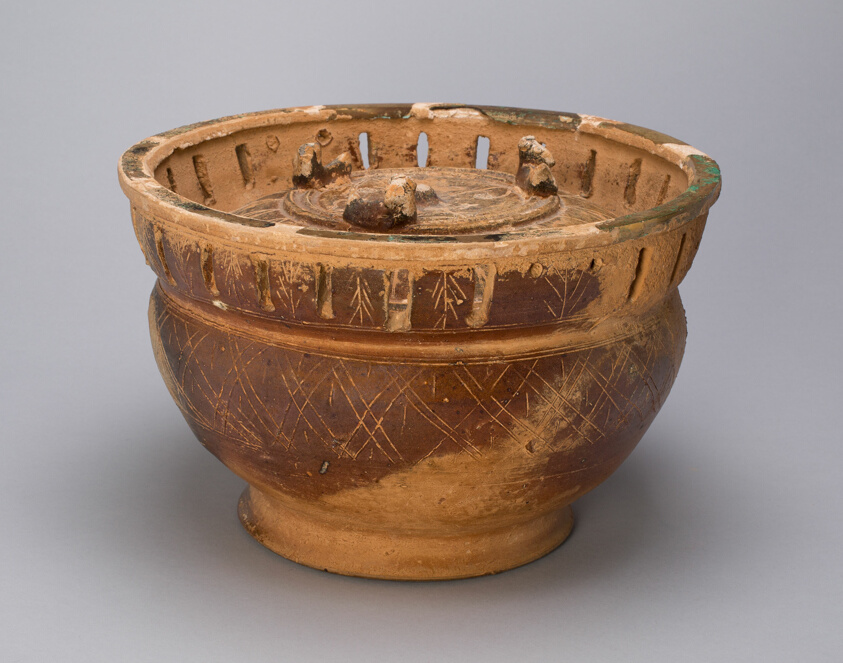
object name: Vessel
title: Bowl-Shaped Vessel with Cover (Gui) and Pierced Collar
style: Chinese (culture or style)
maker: China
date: Eastern Han dynasty (25–220 A.D.), 1st century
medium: Stoneware with grayish-green glaze and underglaze incised decoration, gilt bronze applied to mouth-rim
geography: China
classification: vessel; stoneware; ceramics; asian art